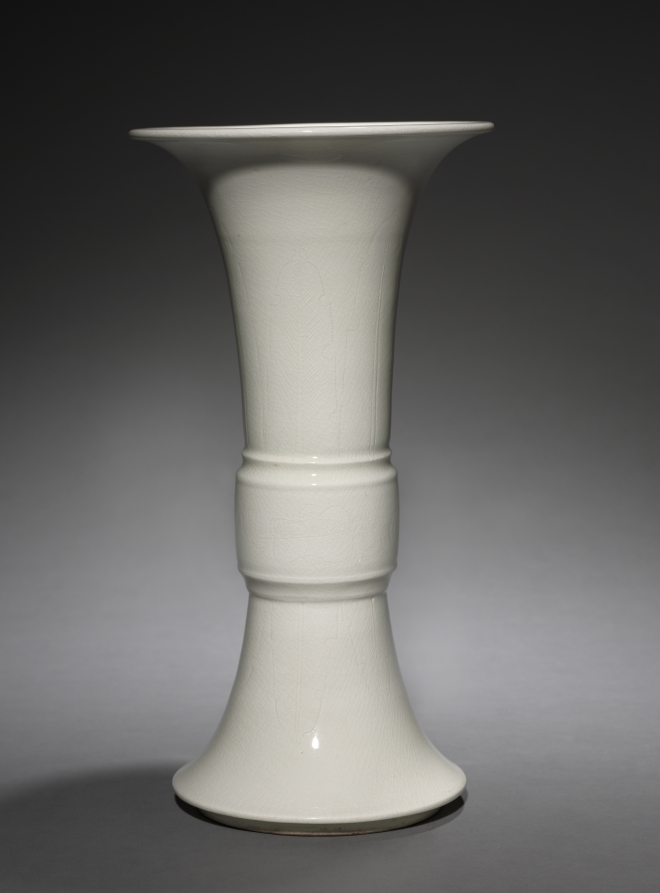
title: Beaker Vase: Zun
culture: China, Qing dynasty (1644-1911), Kangxi reign (1661-1722)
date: 1661–1722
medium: porcelain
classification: Ceramic